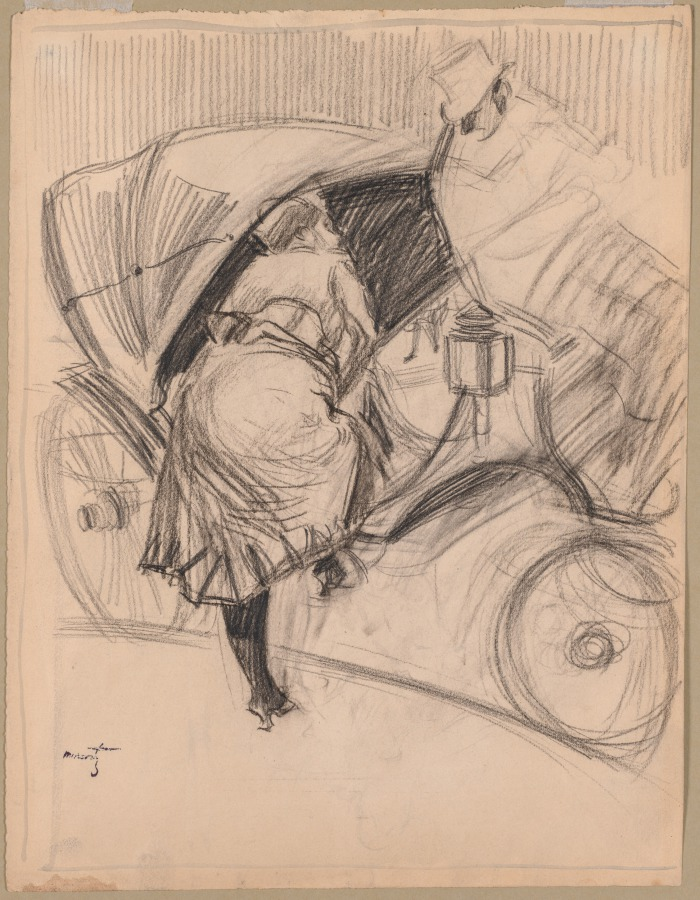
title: Woman Entering a Fiacre (recto)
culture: France, 19th century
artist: attributed to Jean Louis Forain (French, 1852–1931)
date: late 1800s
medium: Charcoal with black ink framing lines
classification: Drawing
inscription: lower left: unidentified collector’s mark in black: Miasortz (?)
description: This image captures the bustling activity of urban Paris in the late 19th century. A fashionable woman climbs into a fiacre—a four-wheel carriage—from the street curb. Her driver, seated at front, watches as she enters. The artist’s loose, sketchy rendering of the charcoal further emphasizes the sensation of busy city life evoked in this drawing.